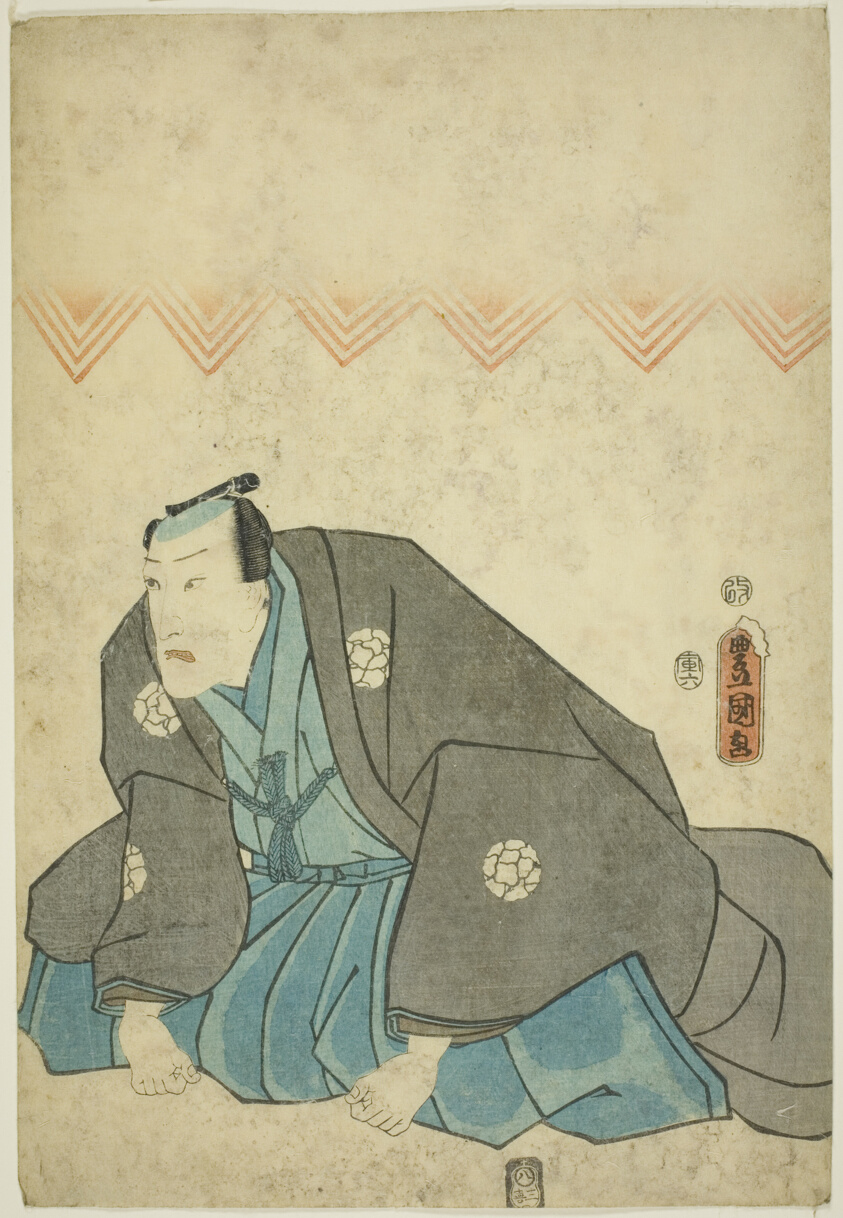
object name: Print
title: Memorial Portrait of the Actor Ichikawa Danjuro VIII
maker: Utagawa Kunisada I (Toyokuni III) (Japanese, 1786-1864)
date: 1854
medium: Color woodblock print; oban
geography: Japan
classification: print; asian art